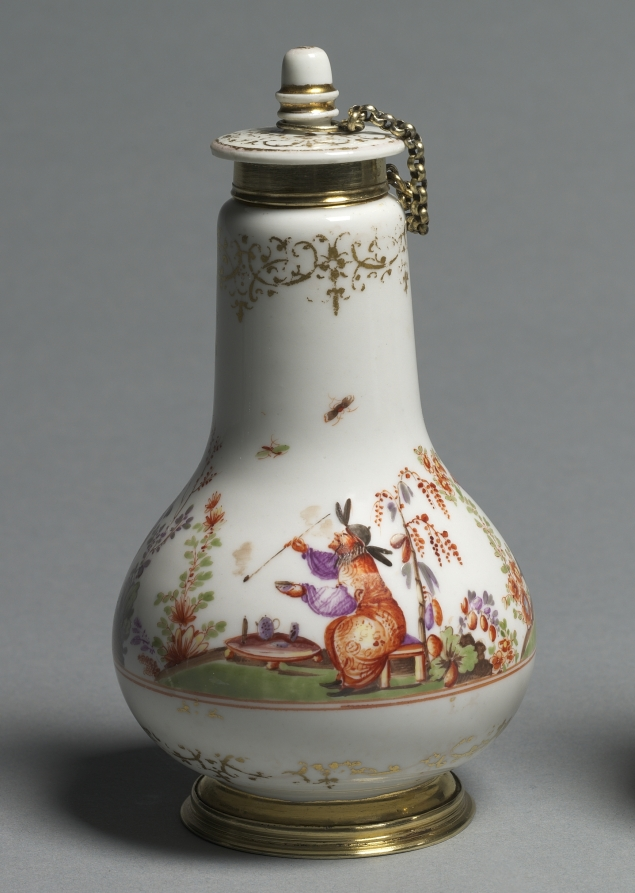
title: Covered Flask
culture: Germany, Meissen, 18th century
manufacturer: Meissen Porcelain Factory (German, est. c. 1710)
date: c. 1720–1723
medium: porcelain with gilt metal mounts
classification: Ceramic